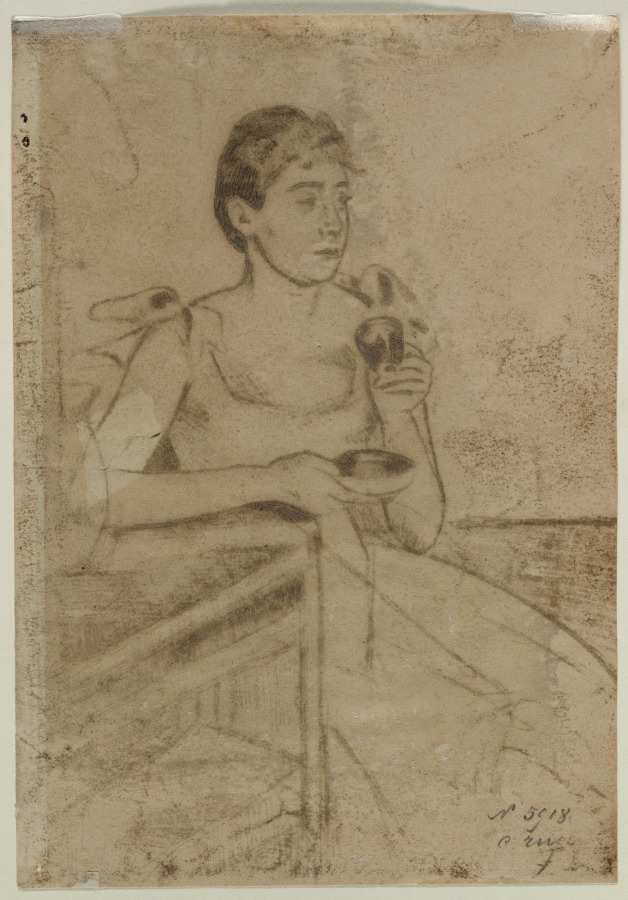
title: After-Dinner Coffee (verso)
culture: America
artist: Mary Cassatt (American, 1844–1926)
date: c. 1889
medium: transferred soft (etching) ground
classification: Print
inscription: inscribed in graphite, lower right: "M. C."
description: Cassatt exhibited prints for the first time in 1880 at the fifth Impressionist exhibition. As the decade progressed, she continued to show her graphic work alongside pastels and paintings. In the spring of 1890, at the Deuxième Exposition de Peintres-Graveurs, she showed a group of drypoints, remarkable in their delicacy and precision, as well as a group of prints made with a combination of aquatint and softground etching that appeared quickly drawn and spontaneous. After-Dinner Coffee is a study for a softground etching with aquatint.